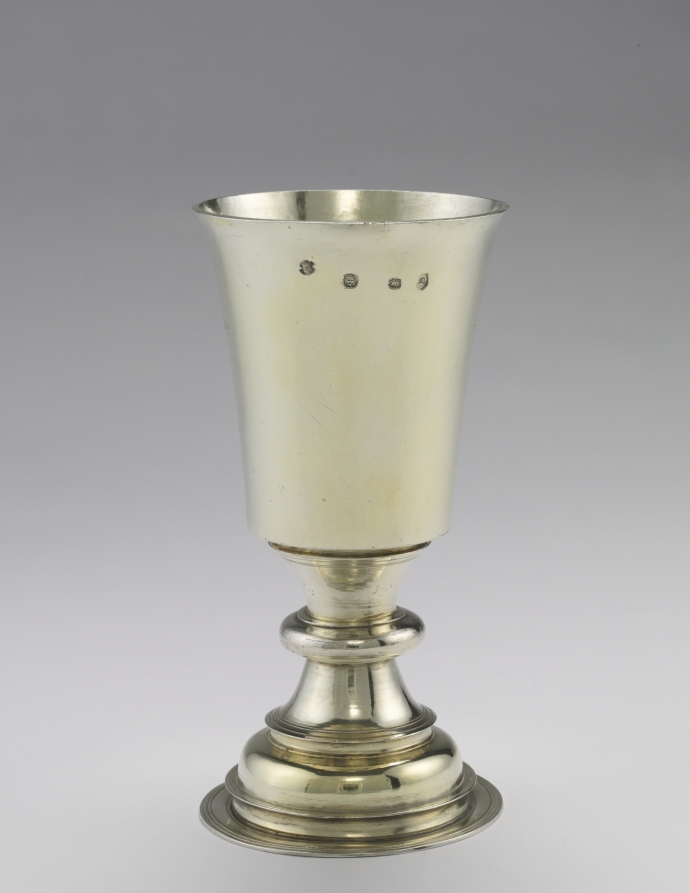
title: Communion Cup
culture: England, London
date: 1671–72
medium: silver gilt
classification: Silver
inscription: engraved on body of cup: "My Bloud is Drinke indeed."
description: This cup was produced shortly after the death of Oliver Cromwell (1599–1658), a leader of the English Civil War and Lord Protector of the British Isles from 1653 to 1658. An intensely religious man, Cromwell believed that the Reformation (1517–1648) failed to sufficiently eliminate Catholic beliefs and practices in Great Britain. The simplified shape and design of this vessel reflects his desire to visually differentiate Protestant communion cups from the chalices used by the Roman Catholic Church.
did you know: The words engraved along the exterior of this cup, "My Bloud is Drinke indeed,” refer to Christ’s instructions during the Last Supper, as described in the New Testament of the Christian Bible.